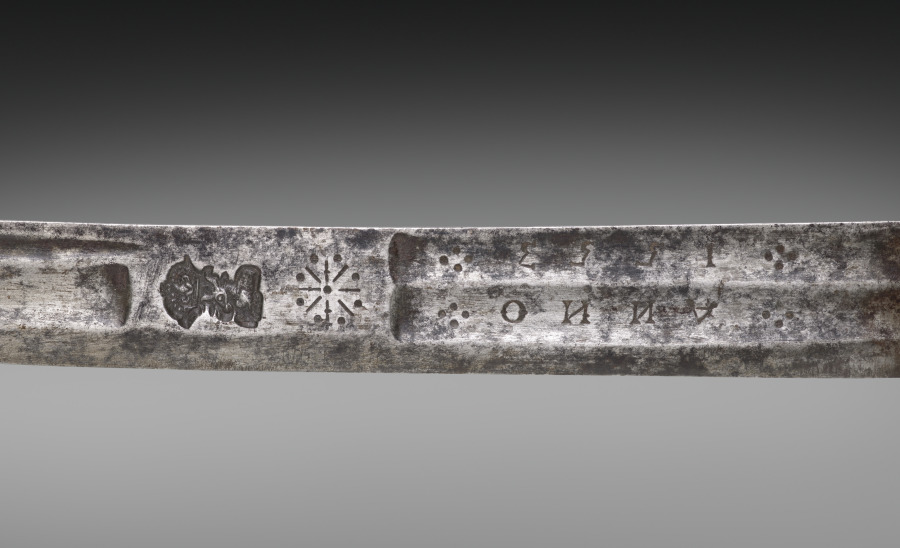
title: Hanger (Hunting Sword)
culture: Hilt: Italy (?); Blade: Germany, Saxony, late 16th-17th Century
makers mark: Jaspar Bongen the Younger (German, active late 1600s)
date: late 1600s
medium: steel; gold and silver damascened hilt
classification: Arms and Armor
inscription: "1553" (Presumed to be a commemorative date)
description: Damascening, the technique of hammering gold and silver wires into grooves cut to receive them, enlivens this sword's hilt. Further texture was added with wires to improve the user's grip, which allowed him to hunt with more control and accuracy. Hunting was a popular sport among the wealthy and many nobles owned tracts of forest, but peasants were prohibited from hunting on these lands.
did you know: The swordsmith's mark, a crowned stag visible on the blade below the hilt, is unidentified.